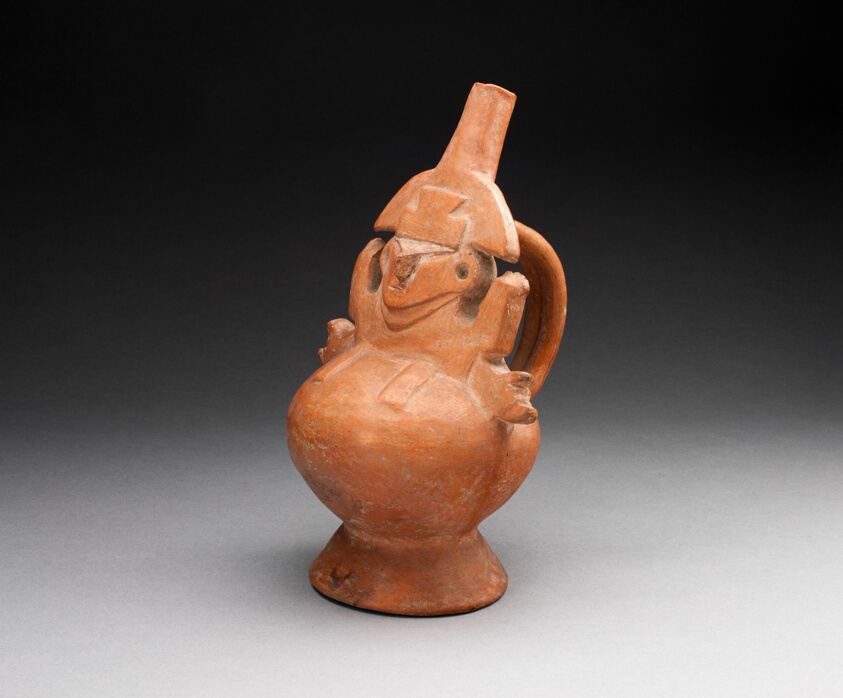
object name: Vessel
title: Single Spout Vessel with Molded Abstract Figure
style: lambayeque, late intermediate period, Pre-Columbian, americas, Arts of the Americas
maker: Lambayeque (North coast, Peru)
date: 1000–1476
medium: Ceramic and pigment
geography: Peruvian North Coast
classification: earthenware; ceramics; vessel; art of the americas